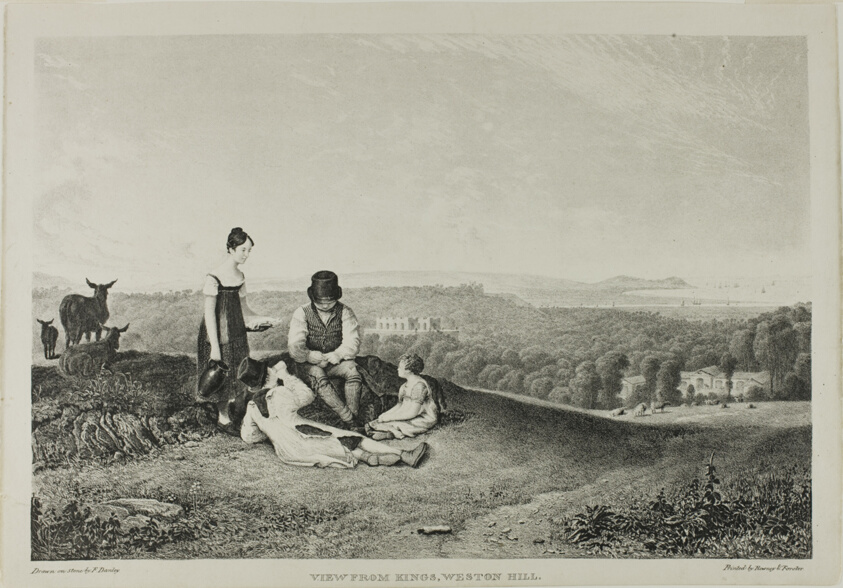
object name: Print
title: View from Kings, Weston Hill, from Three Views, Illustrative of The Scenery of Bristol, and its Vicinity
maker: Francis Danby (English, born Ireland, 1793-1861); printed by Rowney & Forster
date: 1823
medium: Lithograph on ivory wove paper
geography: England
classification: lithograph; print; prints and drawing